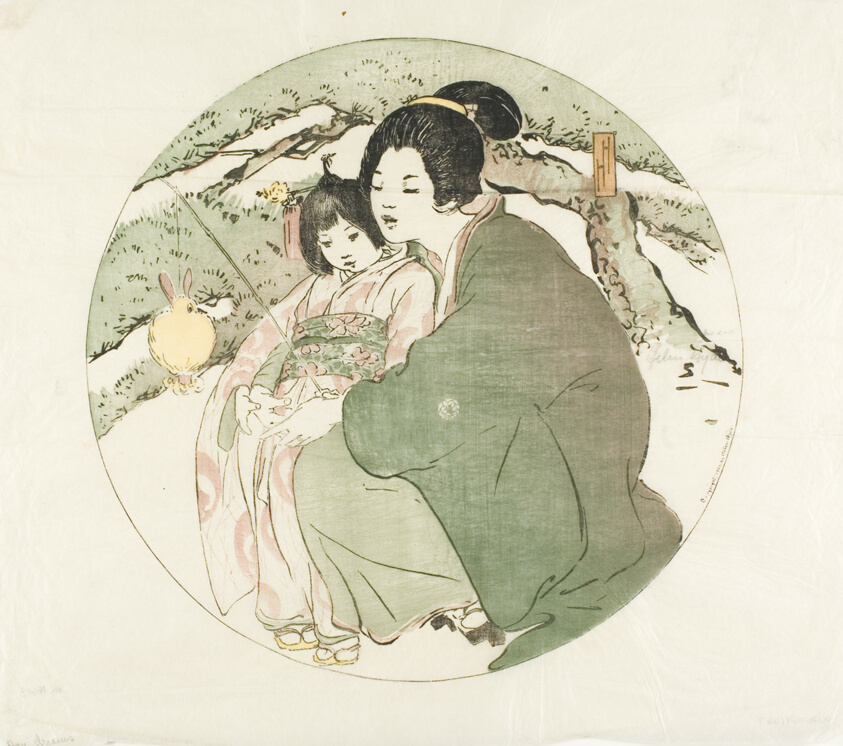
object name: Print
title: Day Dreams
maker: Helen Hyde (American, 1868-1919)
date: 1901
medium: Color woodcut on paper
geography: United States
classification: woodcut; print; prints and drawing